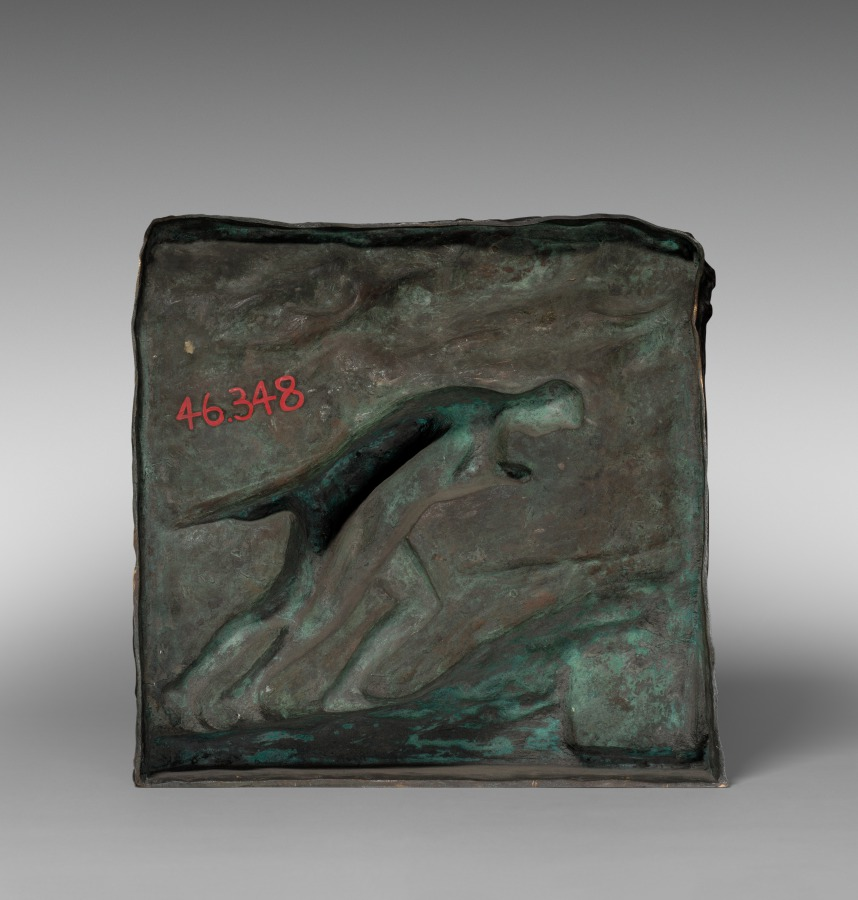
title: The Soil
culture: Belgium, 19th century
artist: Constantin Meunier (Belgian, 1831–1905)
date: c. 1890 – 1900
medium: bronze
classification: Sculpture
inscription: Signed right: "C. Meunier"; inscribed lower right front: "B. Verbeyot, Fondeur, Bruxelles."; lower left: "GLEBE"